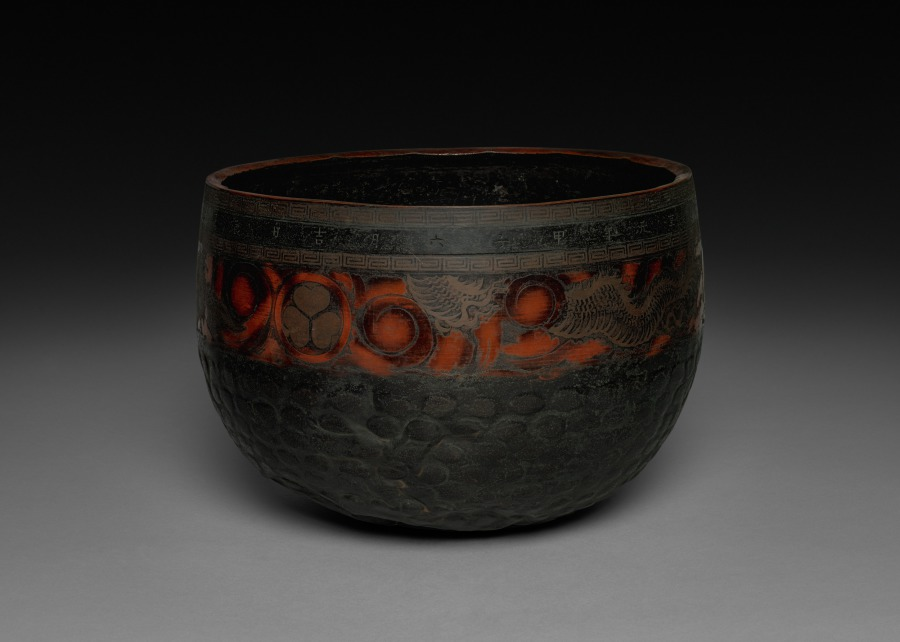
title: Gong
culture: Japan, Edo period (1615–1868)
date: early to mid-1800s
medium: bronze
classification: Metalwork